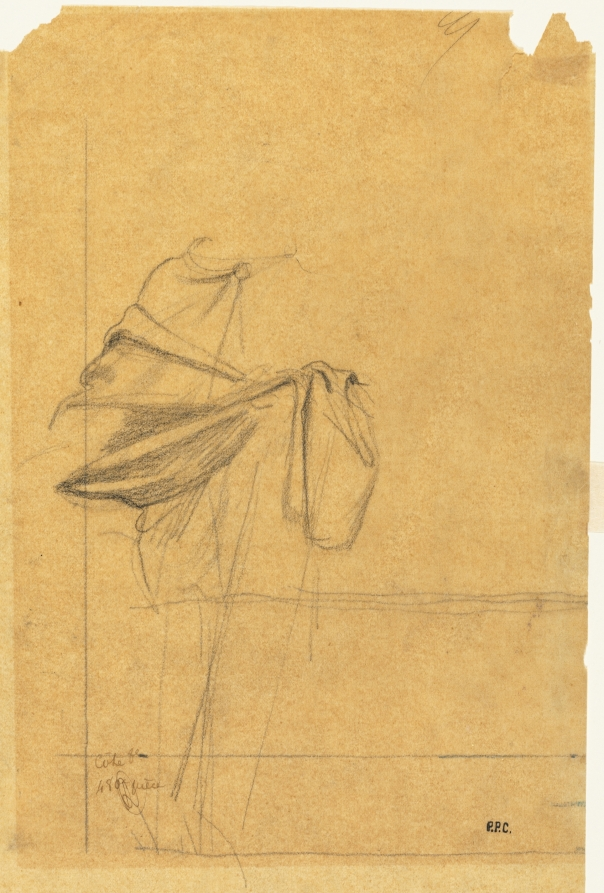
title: Drapery Study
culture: France, 19th century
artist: Pierre Puvis de Chavannes (French, 1824–1898)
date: second half 1800s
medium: black chalk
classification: Drawing